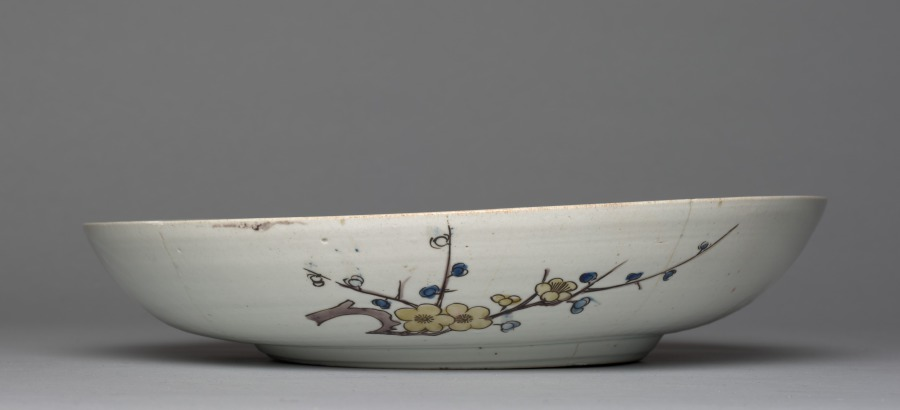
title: Plate with Bird and Flower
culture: Japan, Meiji period (1868–1912) or Taishō period (1912–26)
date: early 1900s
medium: Porcelain with overglaze enamel (Ko-Kutani revival style)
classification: Ceramic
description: This dish is a sophisticated example of later ceramists reinterpreting earlier styles of Japanese porcelain. The colors and patterns used look similar to some works produced on the island of Kyushu in the1600s and 1700s. However, the idea to combine alternating blocks of yellow, green, purple, and blue with a "Chinese grasses" (karakusa) pattern around the rim of the dish is one hit upon in the early 1900s by an artist familiar with the colors and patterns of earlier works.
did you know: Porcelain must be fired at a high temperature to achieve its strength and semitranslucent surface.